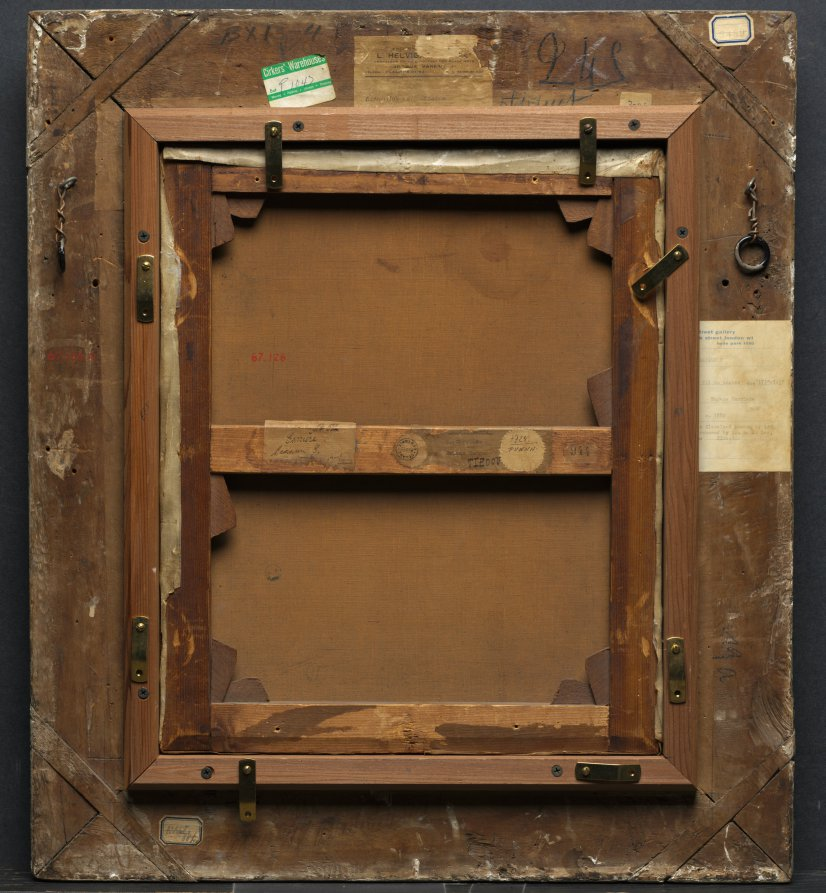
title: Madame Case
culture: France, late 19th-early 20th Century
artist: Eugène Carrière (French, 1849–1906)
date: after September 1900, probably summer 1901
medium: oil on fabric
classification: Painting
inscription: Signed sgraffito into paint at bottom left: Eugène Carrière en toute affection à Jules Case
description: This painting may depict the wife of the artist's close friend, writer Jules Case. In a letter written after her death, Case asked the artist to paint her portrait from an enlarged photograph. "My dear friend," Case wrote, "would you preserve the only face which, from now on, can bring me some little joy, if one can use this word for a sentiment mixed with so much suffering." Carrière emphasized the poetic mood by placing the shadowy figure in a vague, dreamlike space. Known for his evocative paintings of women and children, Eugène Carrière was loosely associated with the French Symbolist movement, which aimed at expressing inner, spiritual life and emotions rather than the outward appearance of physical reality.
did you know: The painting evokes an illusory, dreamy quality that may reflect the fact that Carrière never met his model.